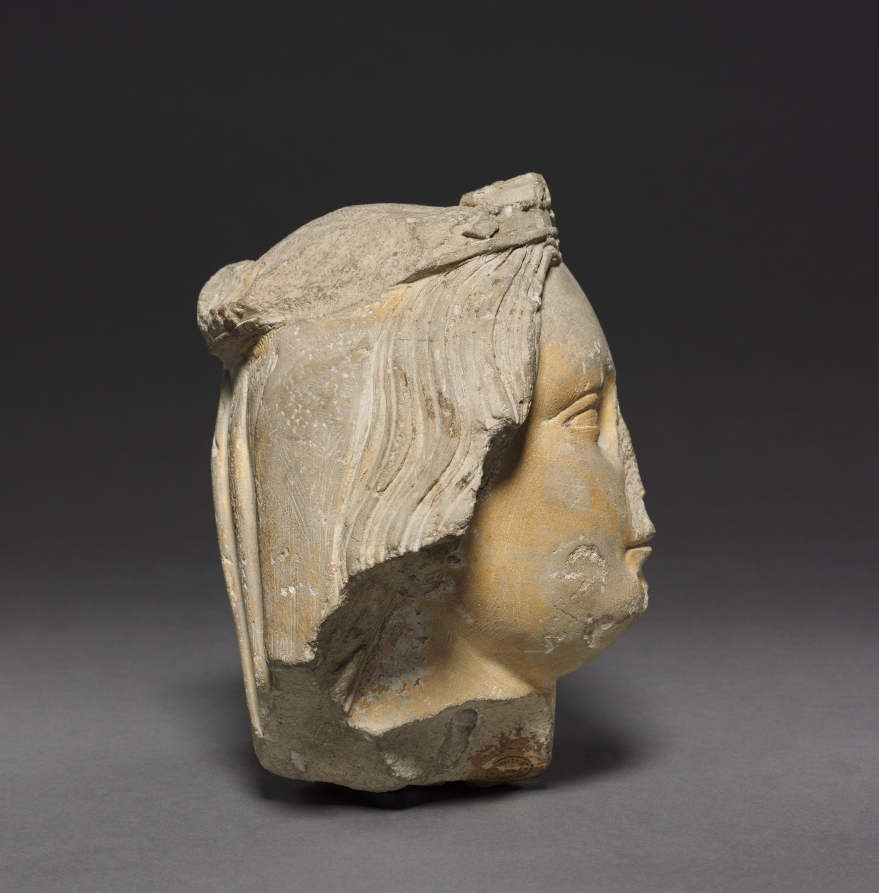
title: Crowned Female Head (Fragment)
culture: France, Champagne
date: c. 1400–1420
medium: limestone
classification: Sculpture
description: The origins of this sculptural fragment are not known. It is perhaps the final trace of the once beautiful figure of a standing Virgin and Child.